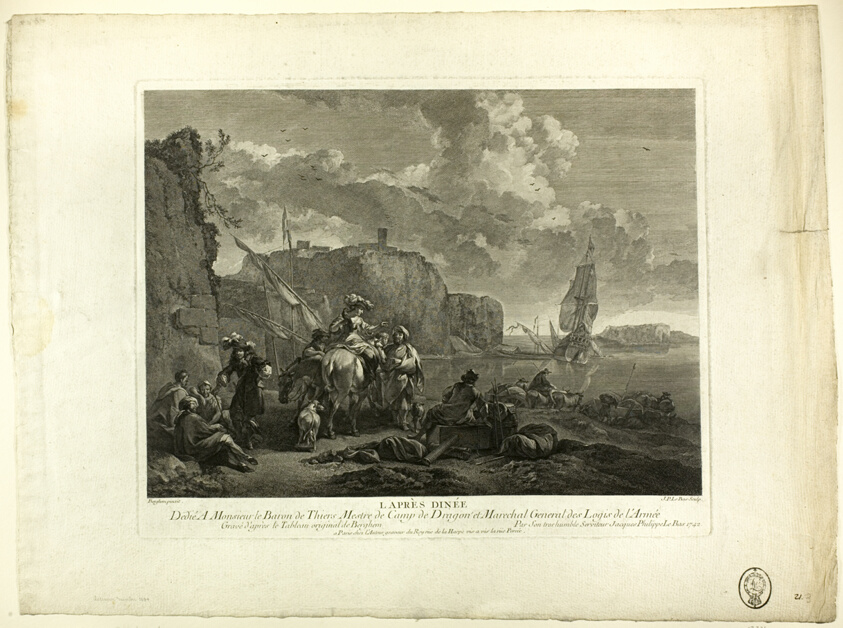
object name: Print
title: After Dinner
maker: Jacques Philippe Le Bas (French, 1707-1783); after Nicolaes Berchem, the elder (Dutch, 1620-1683)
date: 1742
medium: Engraving on paper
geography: France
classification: engraving; print; prints and drawing